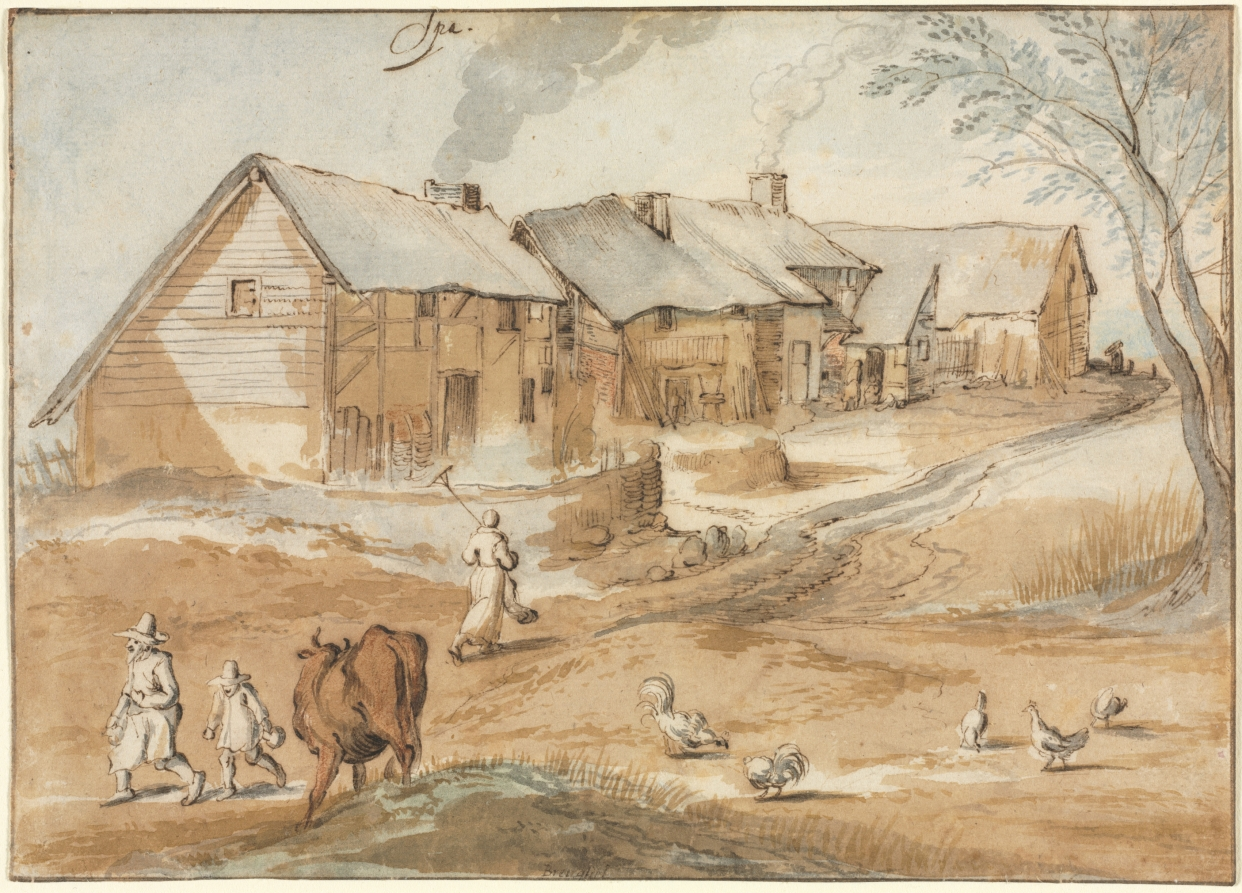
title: A View of Spa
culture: Flanders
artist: Jan Brueghel (Flemish, 1568–1625)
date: c. 1619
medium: pen and brown ink and brush and brown and gray wash, with blue and green watercolor and red chalk wash; framing lines in pen and brown ink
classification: Drawing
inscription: upper center, in brown ink: Spa. ; lower center, in brown ink: Brueghel ; VERSO, center, in brown ink: 110 ; center right, in graphite: 95 ; center right, in graphite: 8 [circled]